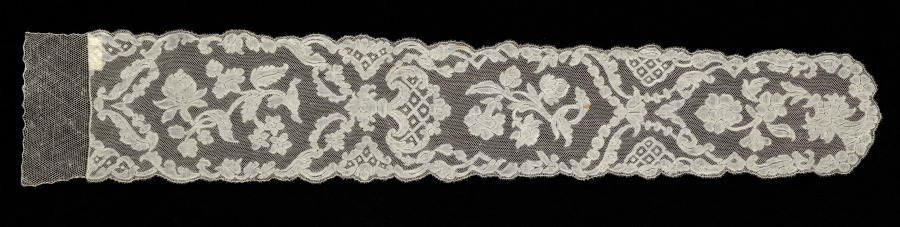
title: Lace Lappet (one of a pair)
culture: France, Valenciennes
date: 1740–60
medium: Linen: bobbin lace (Valenciennes)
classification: Lace